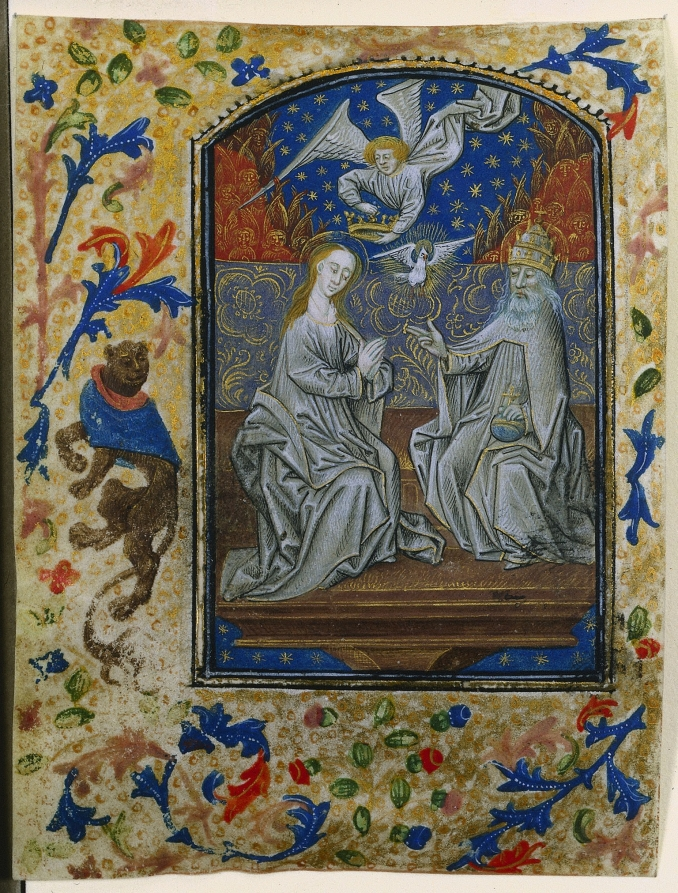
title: Leaf from a Book of Hours: Coronation of the Virgin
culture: Flanders, Bruges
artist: Guillaume Vrelant (Flemish, c. 1454–1481)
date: c. 1470–1480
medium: tempera, liquid gold, and grisaille on vellum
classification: Manuscript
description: Guillaume Vrelant, born in Utrecht, was known to be in Bruges from 1454 onward where he died around 1481. He probably went there to sidestep a 1427 law which banned the sale of Utrecht images. A painter very much in vogue, he founded the Illuminators’ Guild in Bruges under the patronage of Saint John the Evangelist. He is known to have provided manuscripts to the Burgundian court.